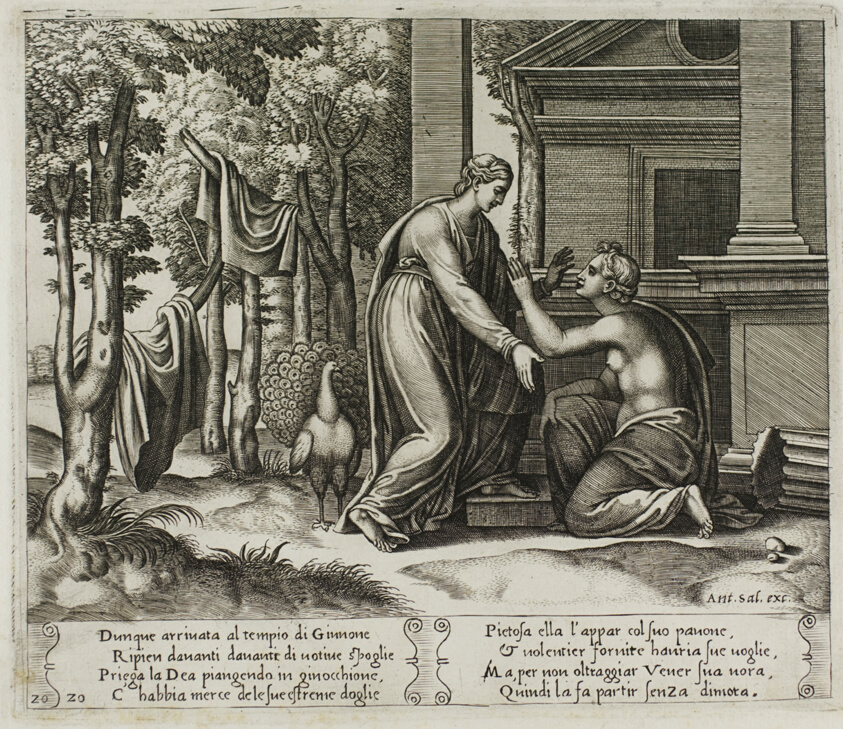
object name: Print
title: Juno Sending Psyche Away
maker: Master of the Die (Italian, active c. 1530-1560); after Michiel Coxcie I (Flemish, 1499-1592); in turn, inspired by Raffaello Sanzio, called Raphael (Italian, 1483-1520)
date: 1530/40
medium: Engraving in warm brown ink on cream laid paper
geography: Italy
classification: engraving; print; prints and drawing